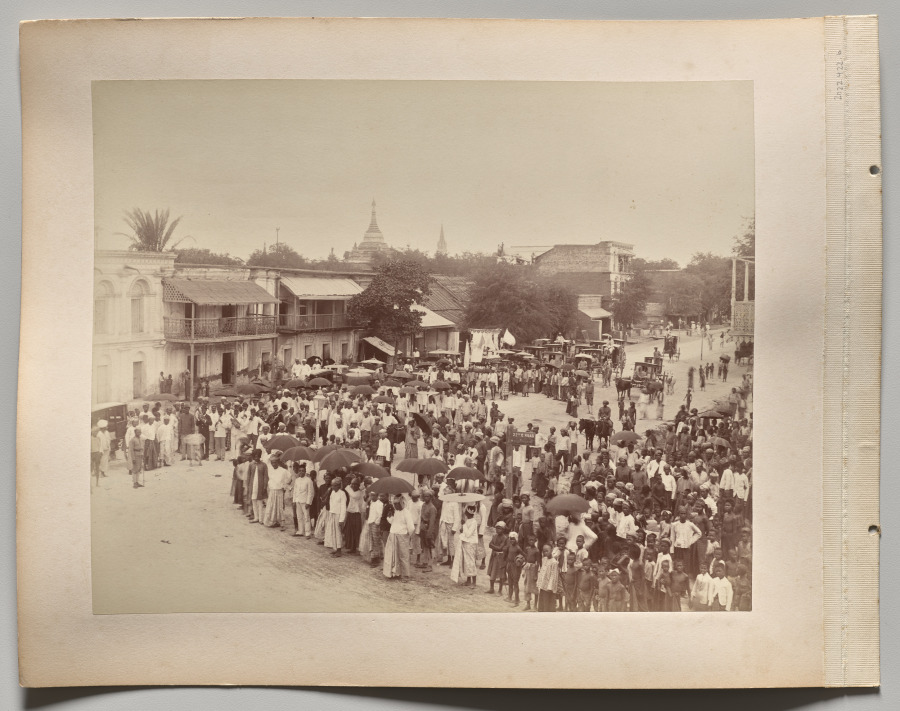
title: Untitled (procession or crowd) (verso)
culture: England, 19th century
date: 1870s-1880s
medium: albumen print mounted on an album page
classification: Photograph